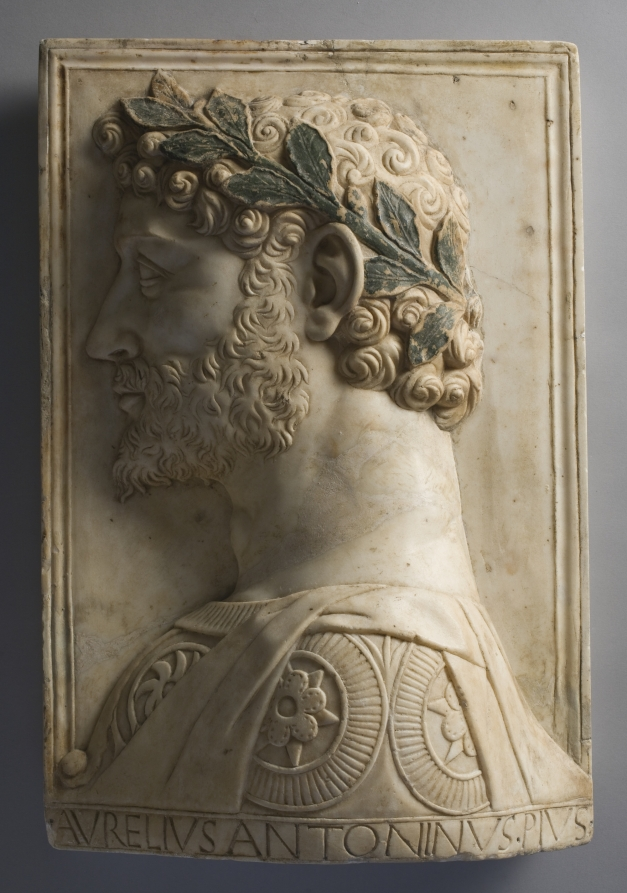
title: Aurelius Antoninus Pius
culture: Italy, Lombard School, late 15th century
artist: Gregorio di Lorenzo (Italian, c. 1436–1504)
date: late 1400s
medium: marble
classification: Sculpture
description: A laurel wreath rests on this Roman emperor’s finely articulated corkscrew curls, underscoring his military triumphs. While many ancient and classically inspired marble sculptures were painted, the survival of pigments is rare. In addition to the vibrant green coloring, traces of gold also remain on the leaves.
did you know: The artist can be identified by his distinctive flame-shaped curls forming the beard.